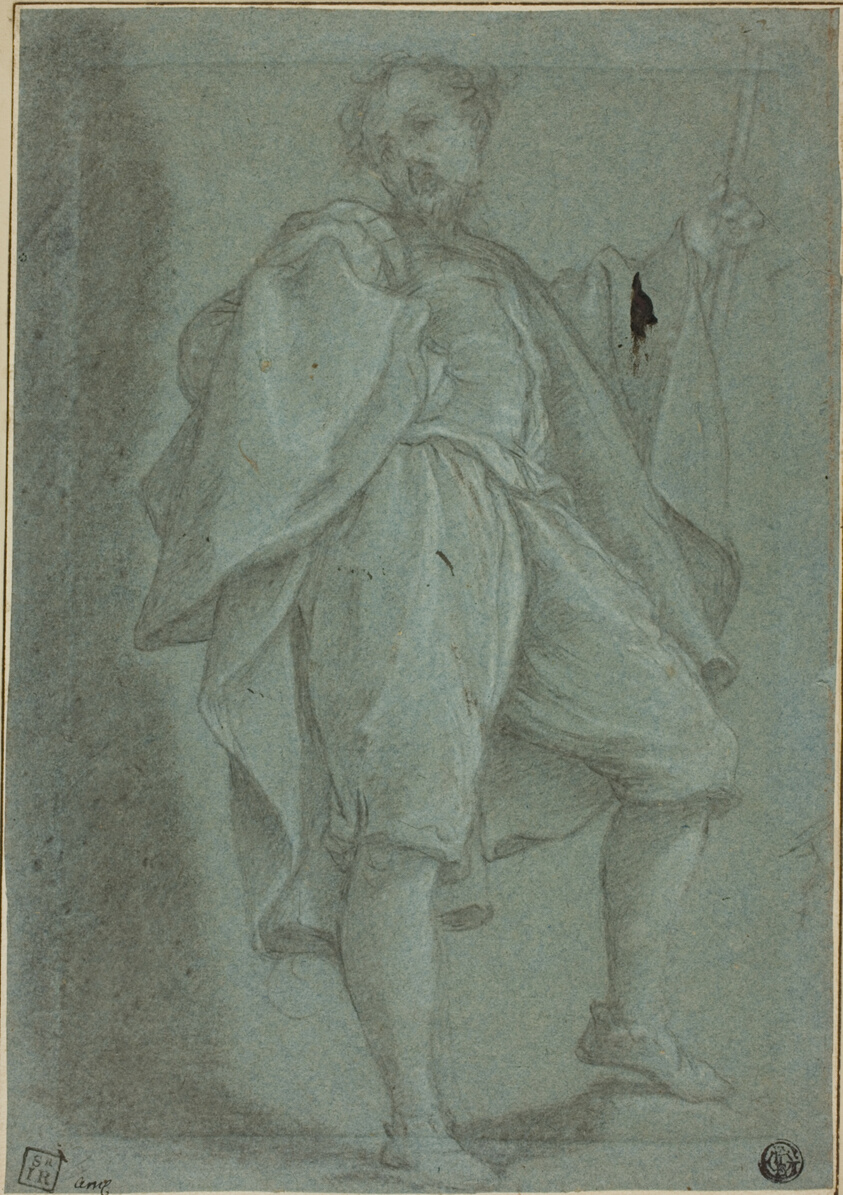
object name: Drawing and Watercolor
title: Man Standing with Staff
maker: Attributed to Gregorio Pagani; Italian, 1558-1605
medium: Black chalk, heightened with white chalk, on blue laid paper, laid down on cream wove paper, laid down on tan wove paper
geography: Italy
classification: chalk; drawings (visual works); prints and drawing